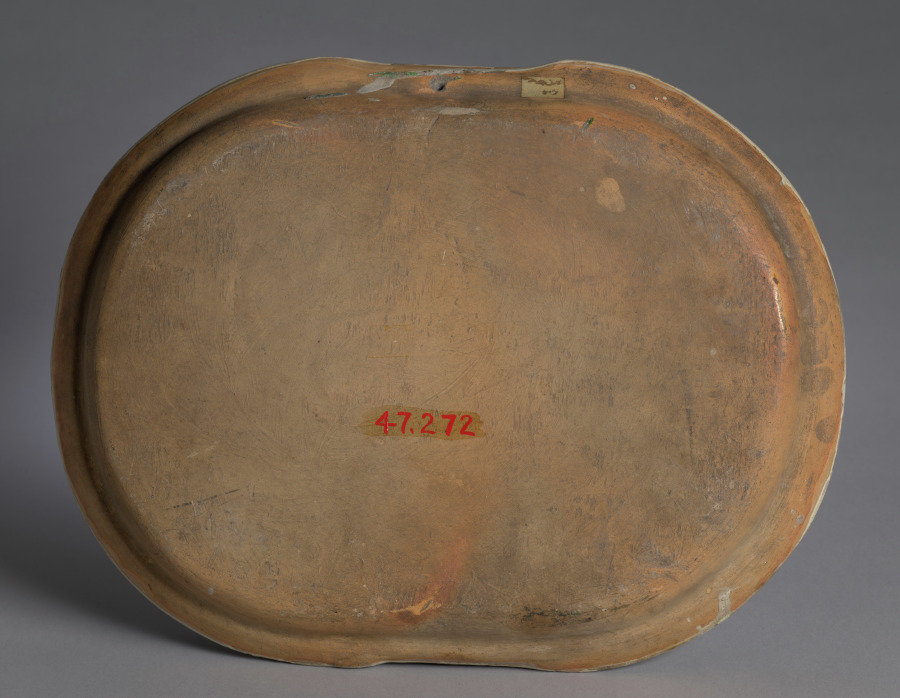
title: Shaving Bowl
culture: Mexico, Guanajuato, 19th century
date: c. 1830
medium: pottery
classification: Ceramic